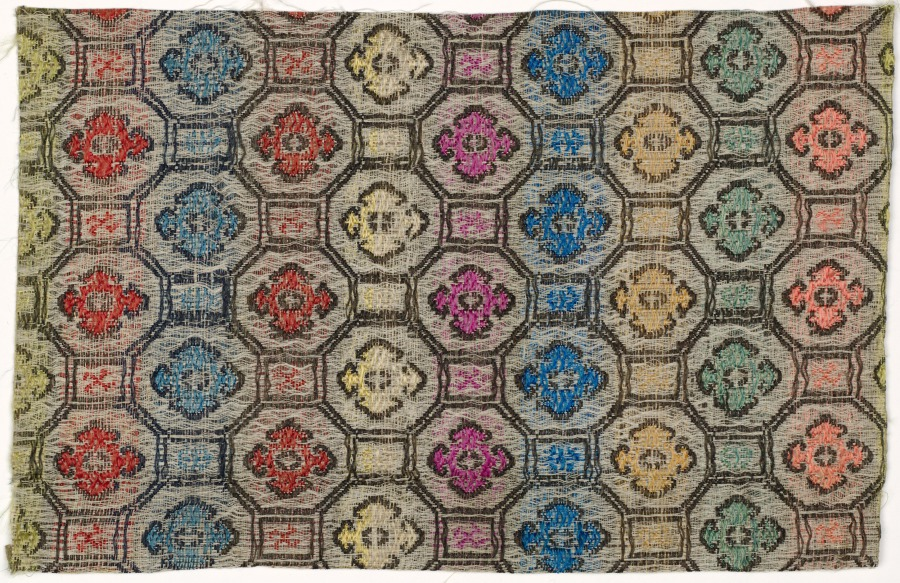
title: Fragment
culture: China ?, 19th century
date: 1800s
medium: silk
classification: Textile